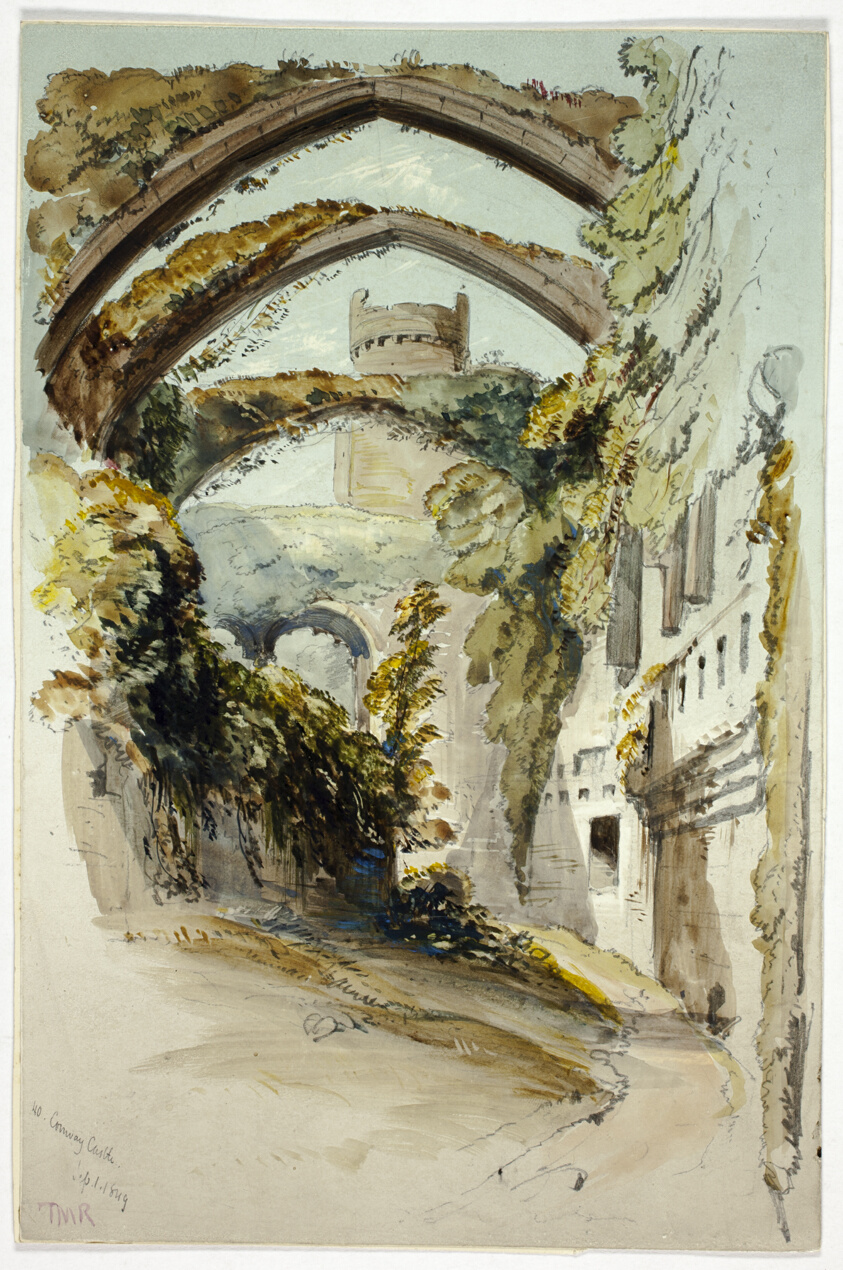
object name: Drawing and Watercolor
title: Conway Castle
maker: Thomas Miles Richardson, the younger (English, 1813-1890)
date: 1849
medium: Watercolor, over graphite, on clay coated paper, tipped onto ivory wove paper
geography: England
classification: watercolor; drawings (visual works); prints and drawing